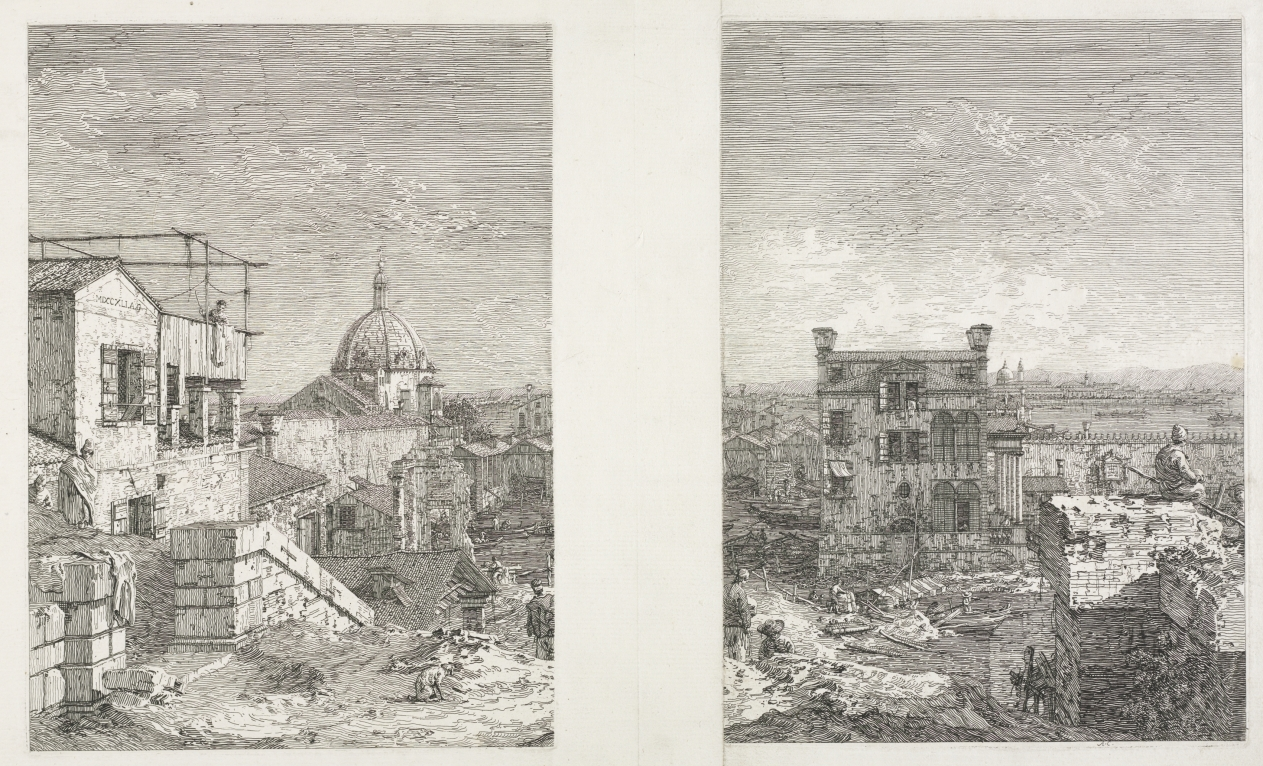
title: Views: A House Surrounded by Six Columns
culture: Italy, Venice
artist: Antonio Canaletto (Italian, 1697–1768)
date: 1735–1746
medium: etching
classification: Print